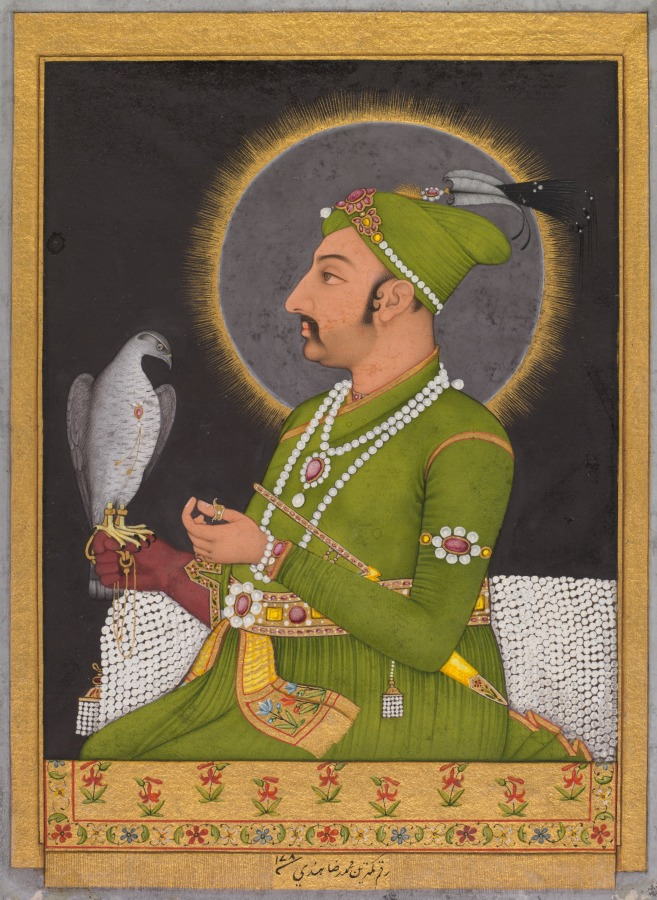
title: Posthumous portrait of the Mughal emperor Muhammad Shah (reigned 1719–1748) holding a falcon (recto)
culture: Mughal India, probably Uttar Pradesh, Lucknow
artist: Muhammad Rizavi Hindi (Indian, active mid-1700s)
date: 1764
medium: Gum tempera, ink, and gold on paper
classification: Painting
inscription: raqam-i kamtarin Muhammad Reza-i Hindi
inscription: tasvir Muhammad Shah Padshah Ghazi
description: The artist used the carpet, the floor cushion, and the halo to indicate the royal status of the seated figure. He has turned the picture plane into the space of a window, over the sill of which a golden carpet ornamented with a field of lilies marks his location for outsiders. His signature in Persian, the Mughal lingua franca, interrupts the fringed border. Painted after the emperor’s death and the dissolution of much of the Mughal court, this refined portrait pays tribute to the wealth and power of the imperial past.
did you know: The archer’s thumb ring is for drawing the bowstring. Perhaps he was left-handed.